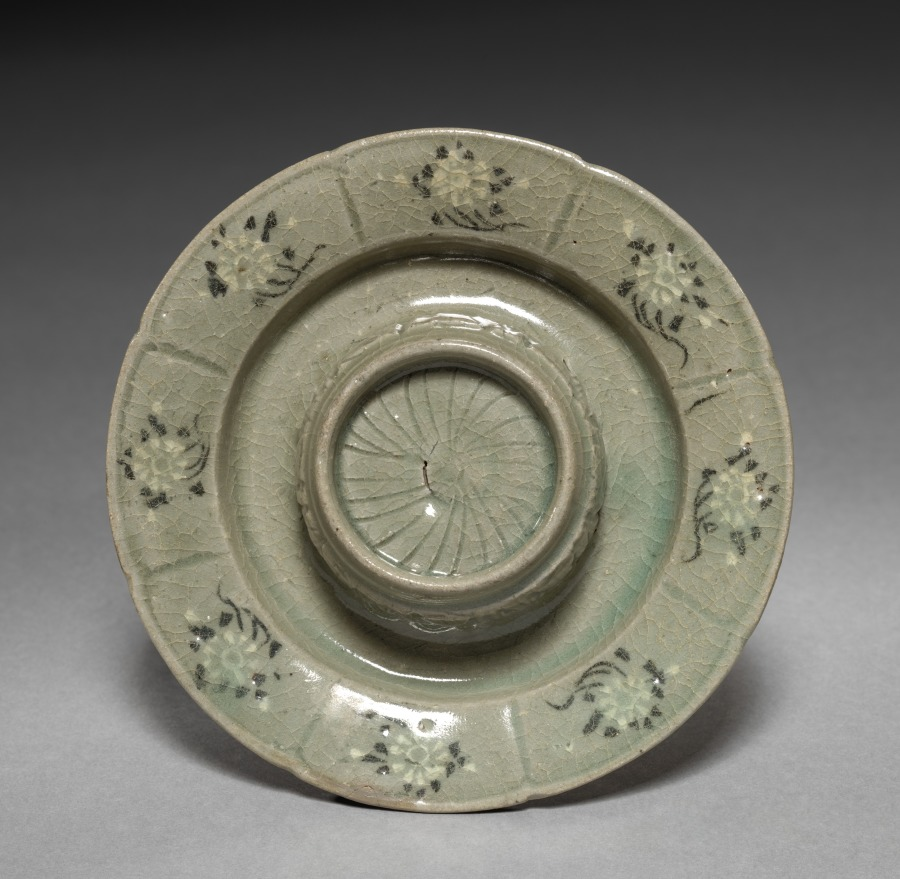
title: Floral-shaped Cup Stand with Inlaid Chrysanthemum Design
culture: Korea, Goryeo dynasty (918–1392)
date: 1100s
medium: inlaid and glazed porcelain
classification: Ceramic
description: As early as the 600s, the practice of drinking tea and wine became an important part of elite culture in Korea. Elites of the Goryeo period commissioned a variety of types of utensils and vessels including this delicate-looking cup stand, not only to make their drinking experience more exciting, but also to show their refined taste.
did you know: During the Goryeo period, a variety of types of tea ware, including this delicate-looking cup stand, were widely used.